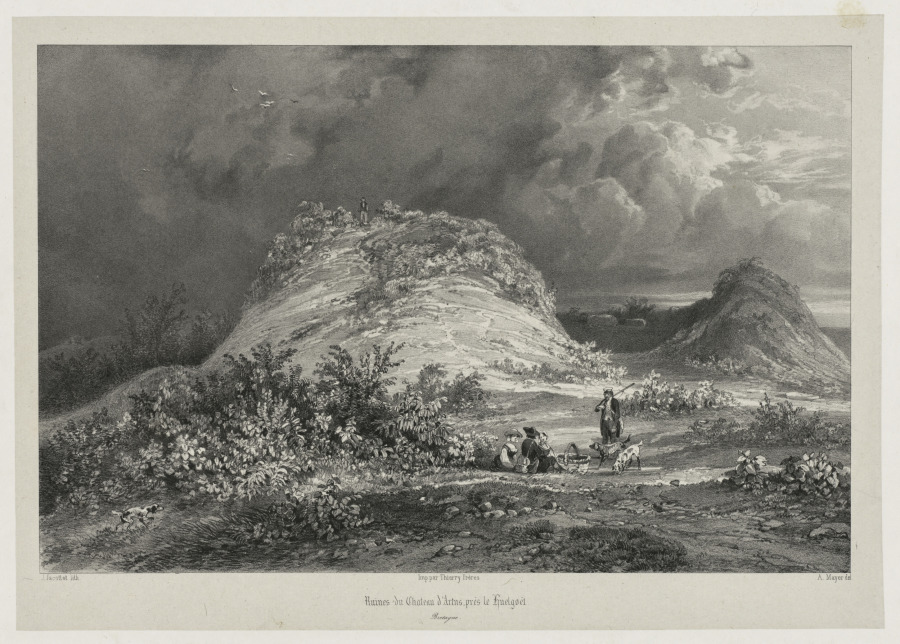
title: Ruines du Chateau d'Artns pres le huelgoet, Bretagne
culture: Switzerland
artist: Julien Louis Jacottet (Swiss, 1806–1880)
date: 1845–1846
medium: lithograph on chine collé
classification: Print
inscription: In plate, lower left: J. Jacottet lith, center: Imp. par Thierry Freres, lower right: A. Mayer del, mid-center: Ruines du Chateau d'Artus pre le huelgoet, lower center: Bretagne